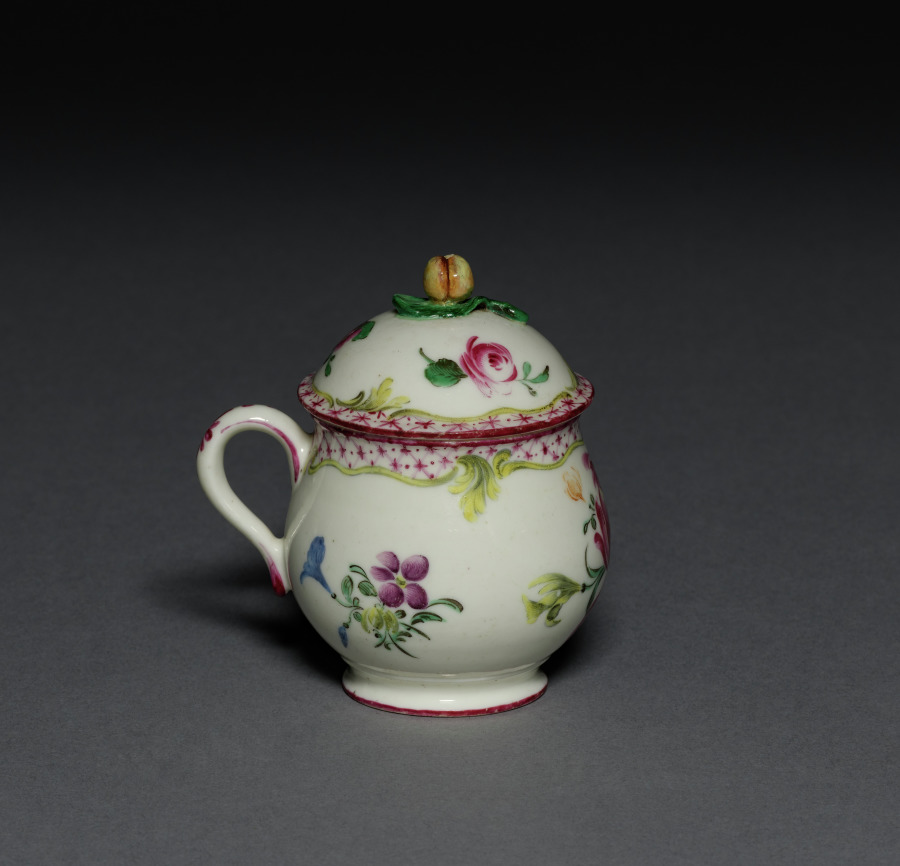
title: Custard Cup with Cover (pot à jus)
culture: France, Mennecy, 18th century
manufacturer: Mennecy- Villeroy Factory (French)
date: c. 1750–55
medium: soft-paste porcelain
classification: Ceramic